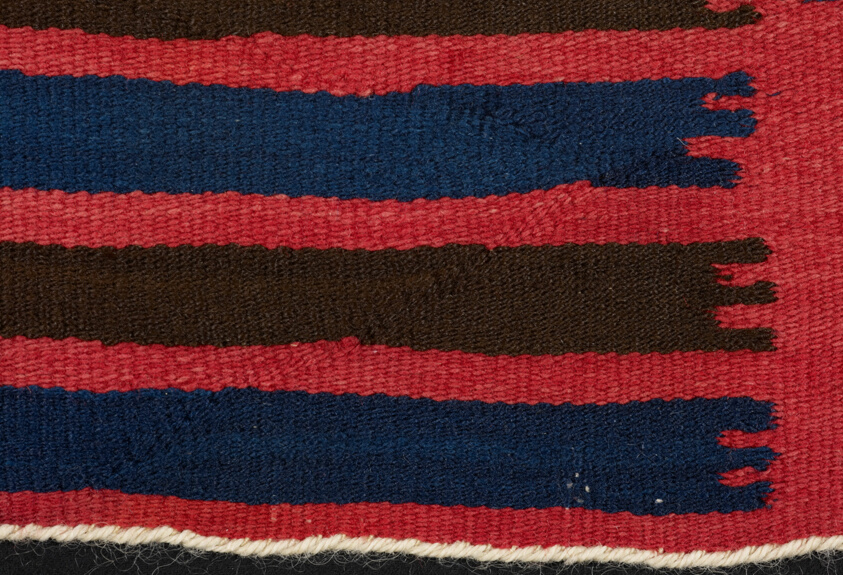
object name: Costume and Accessories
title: Wearing Blanket (Phase II)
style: navajo, americas, dine, 19th century, Arts of the Americas, indigenous, southwest, native american, north american, native north american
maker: Navajo (Diné) (Arizona, New Mexico, and Utah, United States)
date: 1850-65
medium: Wool; single interlocking tapestry weave; twined edges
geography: Navajo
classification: textile; blanket (covering); costume; garment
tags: geometric, arrow, squares, stripes